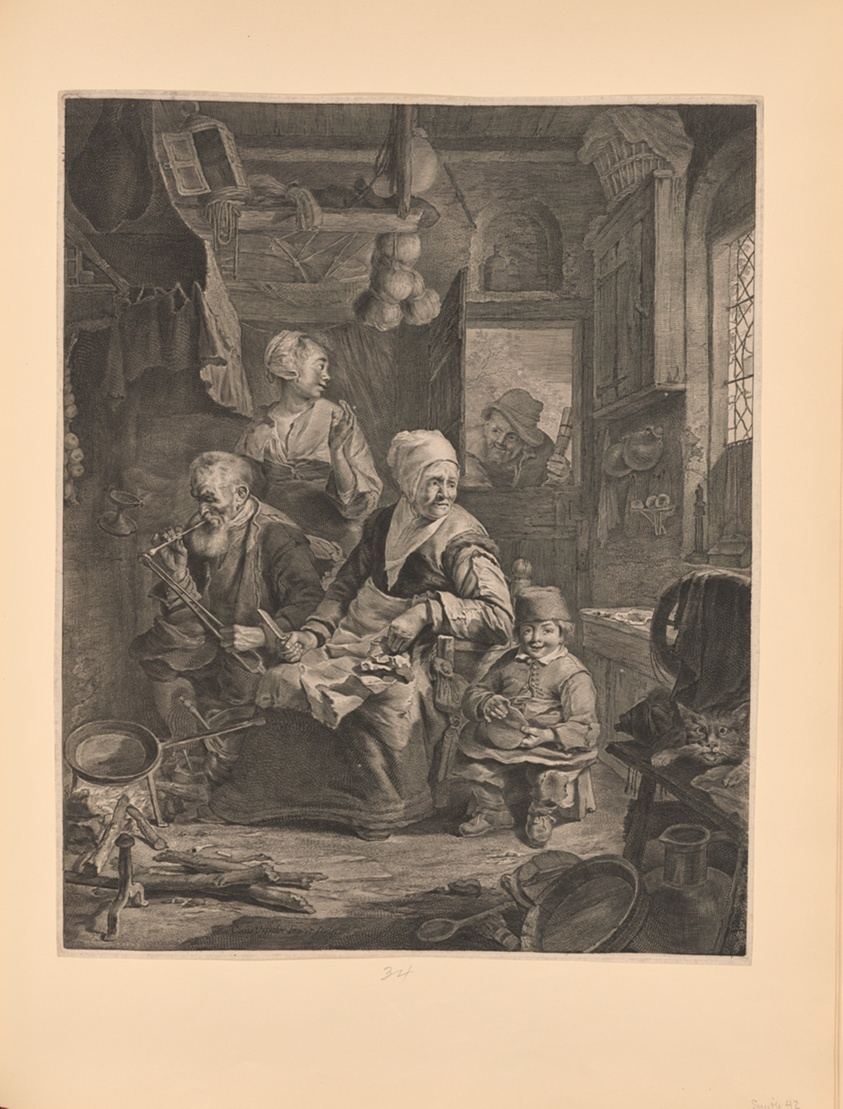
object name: Print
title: The Pancake Woman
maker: Cornelis Visscher (Dutch, c. 1629-1658)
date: c. 1651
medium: Etching and engraving on paper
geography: Netherlands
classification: engraving; paper; print; prints and drawing